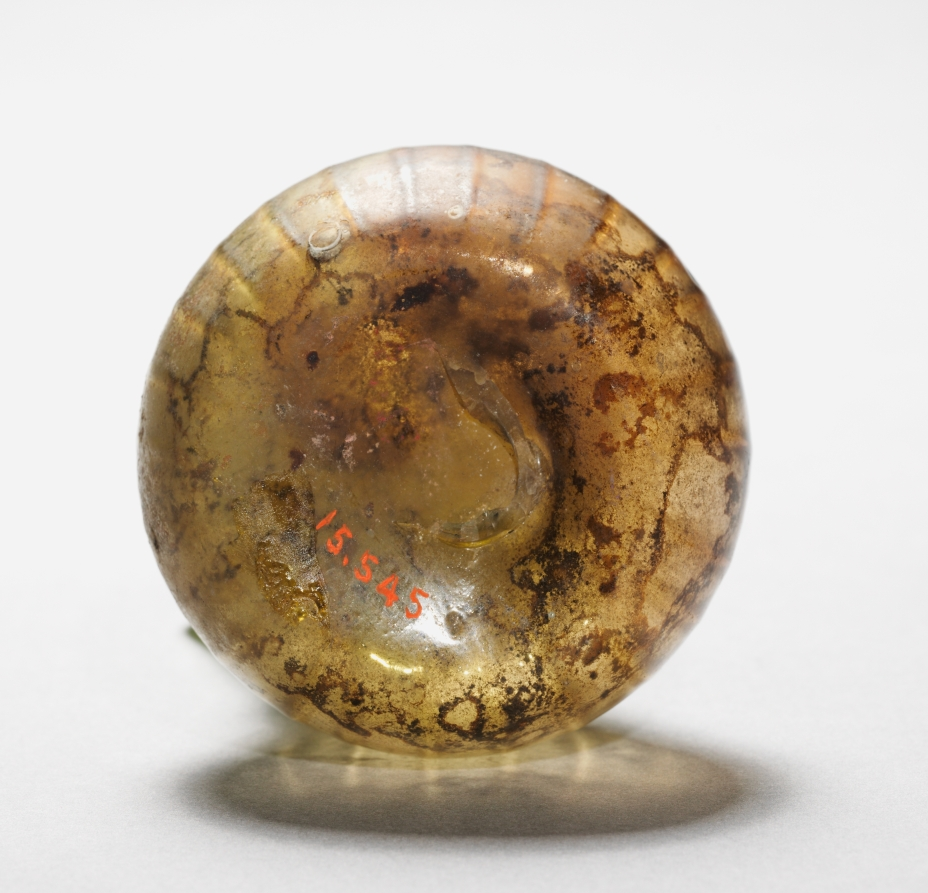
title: Pitcher with Handle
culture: Syro-Palestinian, Roman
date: 300s CE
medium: glass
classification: Glass